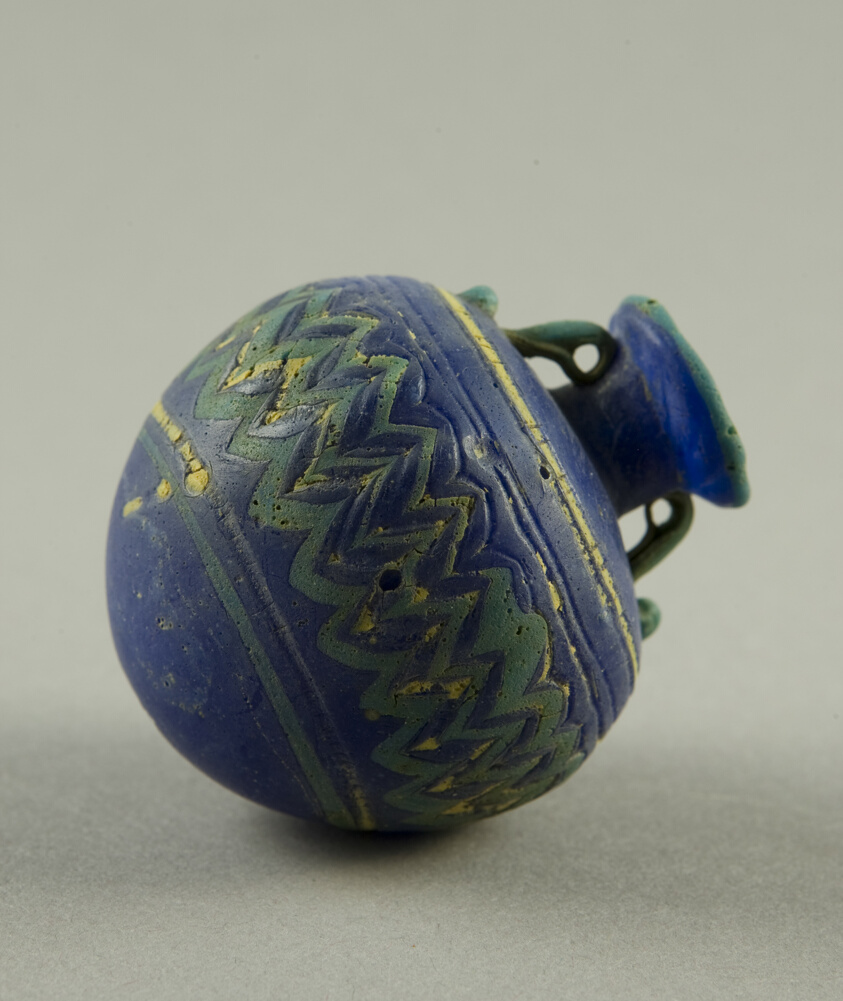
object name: Vessel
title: Flask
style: ancient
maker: Eastern Mediterranean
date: 5th-4th century BCE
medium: Glass, core-formed technique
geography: Egypt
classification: glass; vessel; ancient art